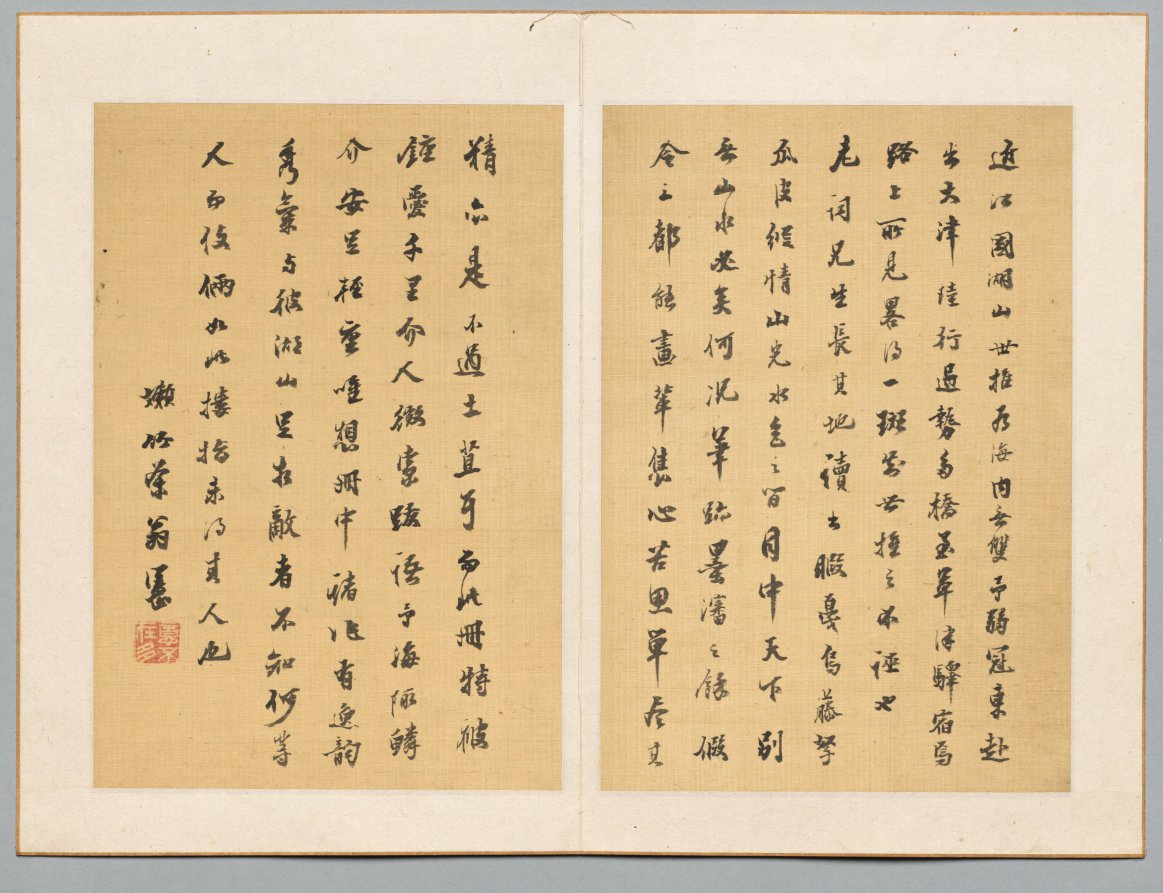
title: Calligraphy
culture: Japan, Edo period (1615–1868)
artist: Tanomura Chikuden (Japanese, 1777–1835)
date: early 1800s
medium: double-leaf from a pair of albums; ink on silk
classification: Painting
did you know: Tanomura Chikuden was a prolific writer; among the most popular of his works was Sanchūjin Jōzetsu (Chatter of a Mountain Dweller), which featured his critiques of painters based on his own hundred rules of painting.